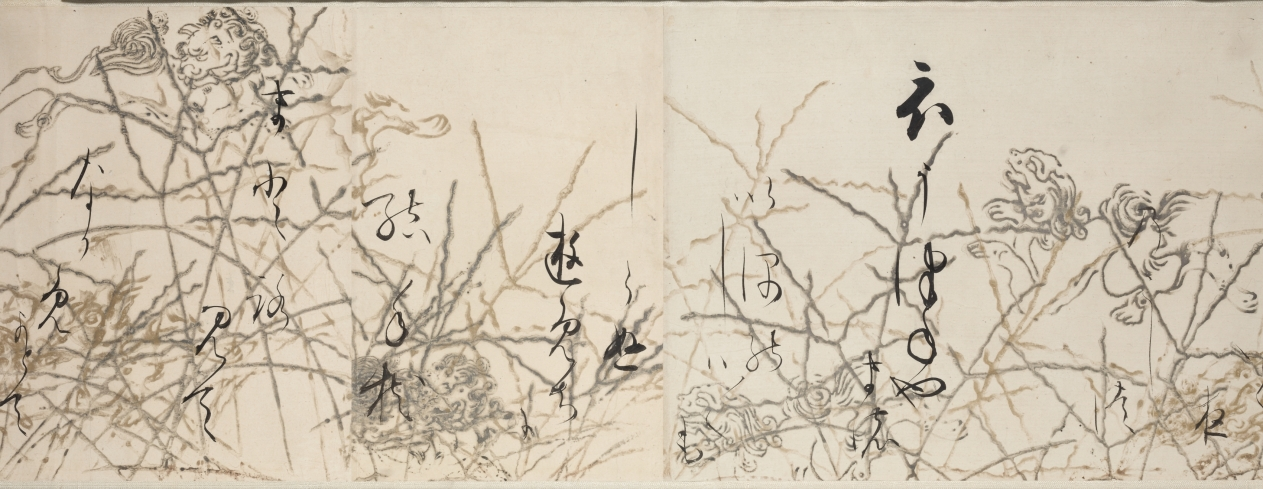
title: Selections from the New Collection of Japanese Poems from Ancient and Modern Times (Shinkokin wakashū) with Printed Designs of Chinese Lions and Crab Finger Grass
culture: Japan, Edo period (1615–1868)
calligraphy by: Hon'ami Kōetsu (Japanese, 1558–1637)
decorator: Tawaraya Sōtatsu (Japanese, c. 1570–c. 1640)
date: early 1600s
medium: handscroll; ink, gold, and silver on paper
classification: Calligraphy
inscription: Seal: 光悦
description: Hon’ami Kōetsu was a calligrapher and craftsman who frequently collaborated with the painter Tawaraya Sōtatsu, considered the first master of the Rinpa school. Kōetsu brushed seven poems from the autumn section of a poetry anthology onto dyed paper with motifs designed and printed in gold and silver by Sōtatsu.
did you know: Before becoming a master painter of screens, Tawaraya Sōtatsu painted fans.